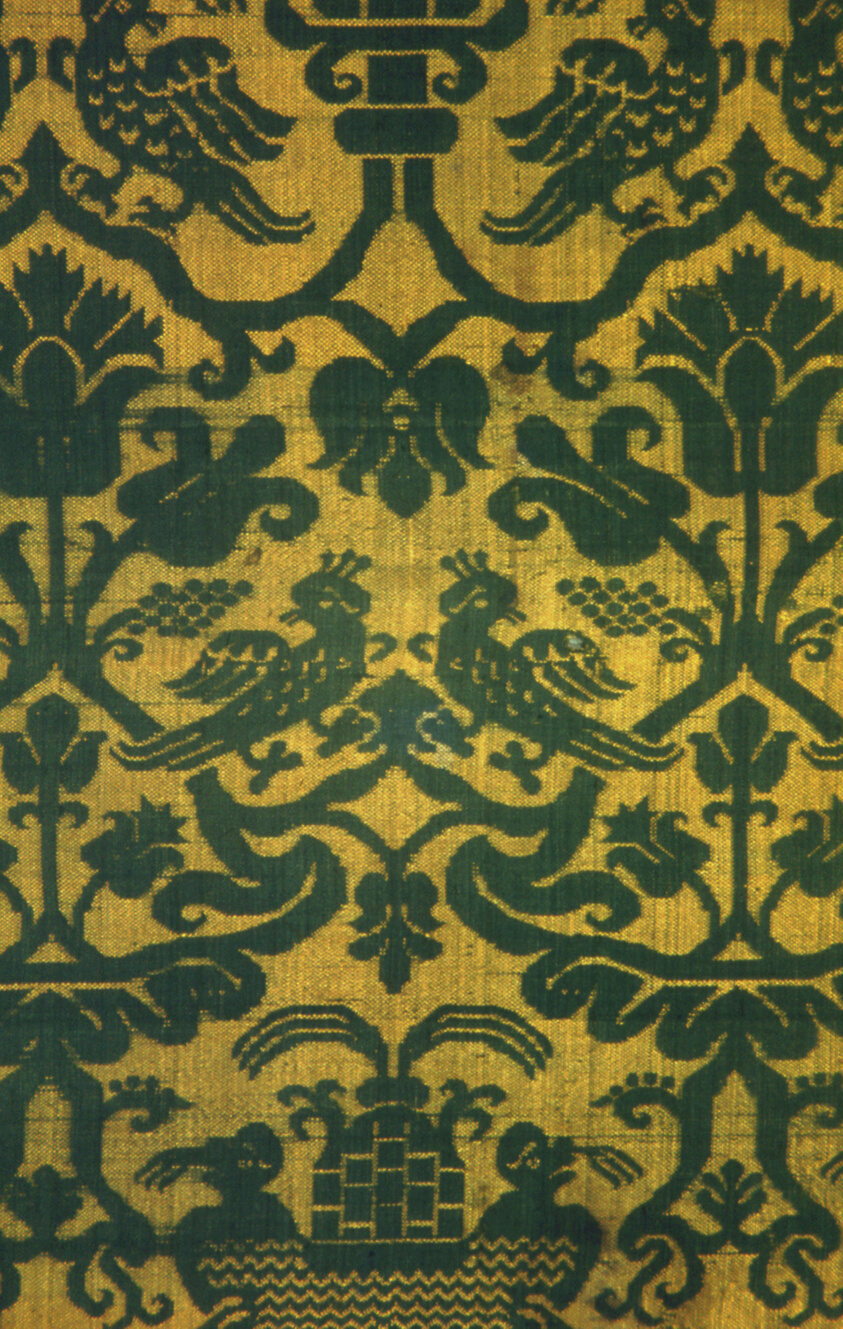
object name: Textile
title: Fragment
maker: Italy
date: 1575/1600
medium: Silk, plain weave with plain interlacings of secondary binding warps and supplementary patterning wefts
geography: Italy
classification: textile; weaving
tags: flowers, animals, birds, fountains